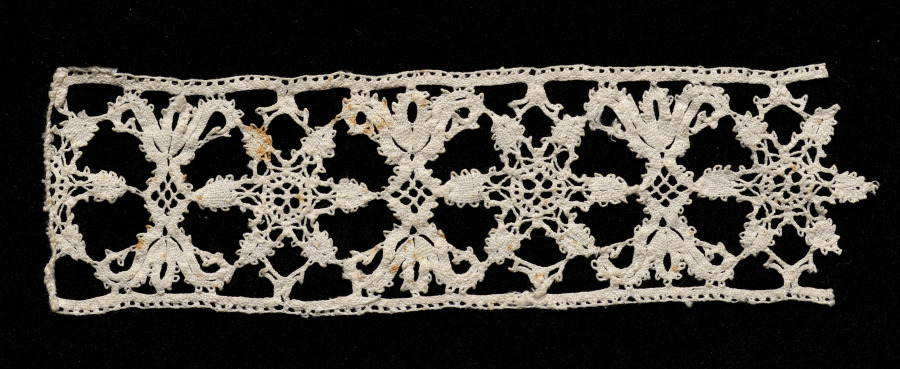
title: Lace Insertion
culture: Italy, Venice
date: 1580–99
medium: Bobbin lace (needle lace, reticella design)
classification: Lace